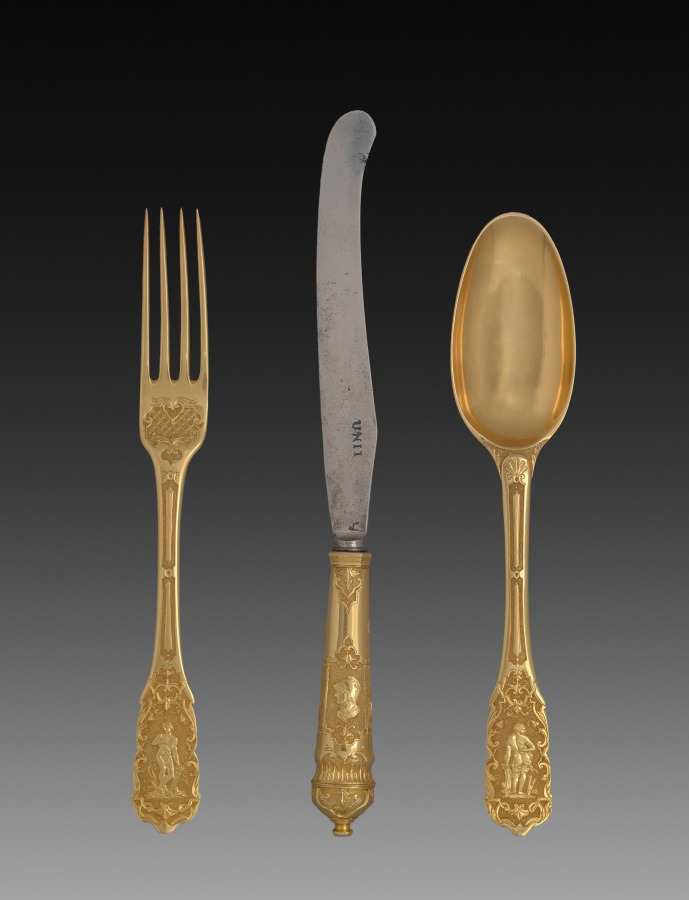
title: Knife, Fork, and Spoon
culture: Germany, Augsburg(?), 18th century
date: c. 1725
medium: gold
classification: Metalwork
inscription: steel blade inscribed: UNI(T ?).